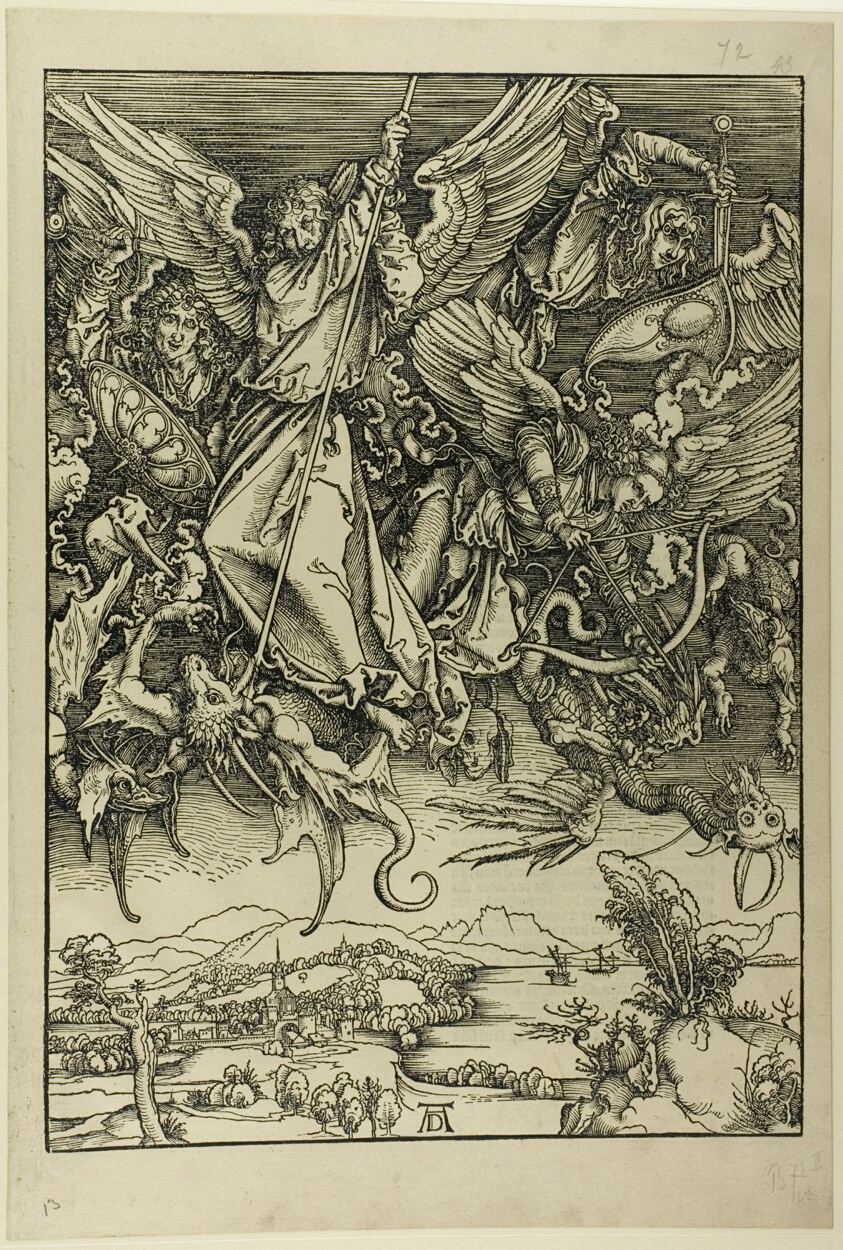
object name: Print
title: St. Michael Fighting the Dragon, from The Apocalypse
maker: Albrecht Dürer (German, 1471-1528)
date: c. 1496–98, published 1511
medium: Woodcut in black on buff laid paper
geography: Germany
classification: woodcut; print; prints and drawing; paper